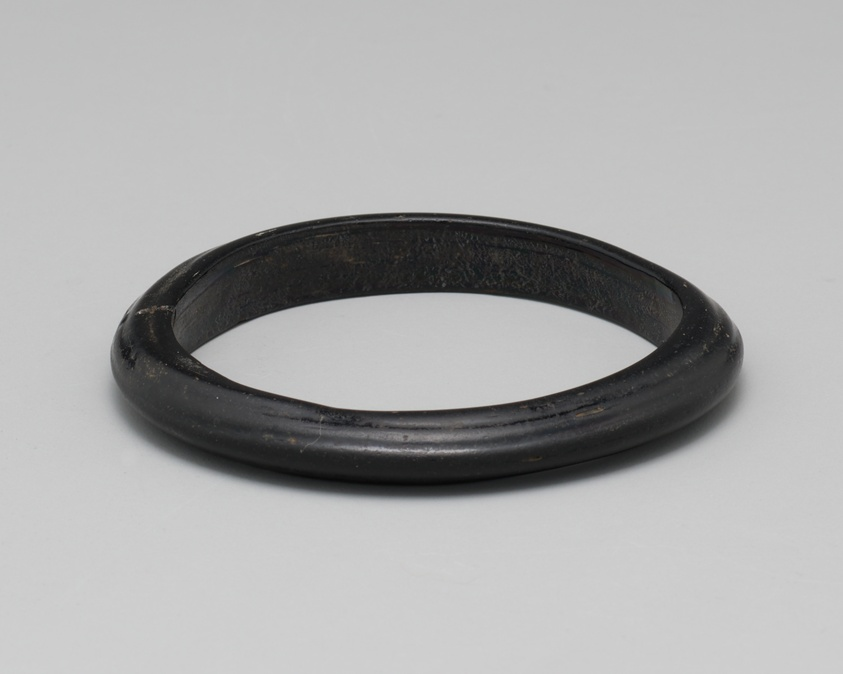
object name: Costume and Accessories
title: Bracelet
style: Islamic (culture or style)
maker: Islamic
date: 14th-15th century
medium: Glass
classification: glass; jewelry; ancient art; costume